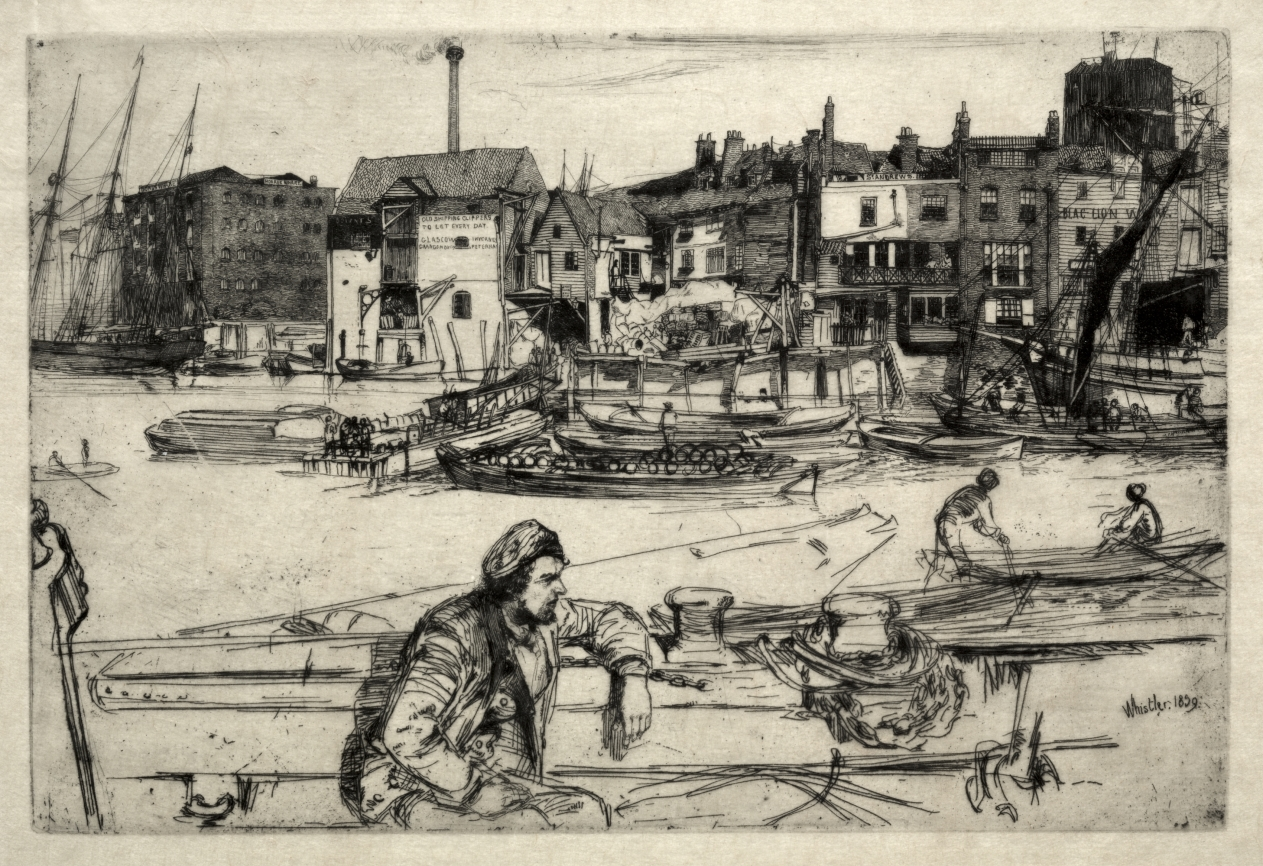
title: Black Lion Wharf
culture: America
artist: James McNeill Whistler (American, 1834–1903)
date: 1859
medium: etching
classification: Print